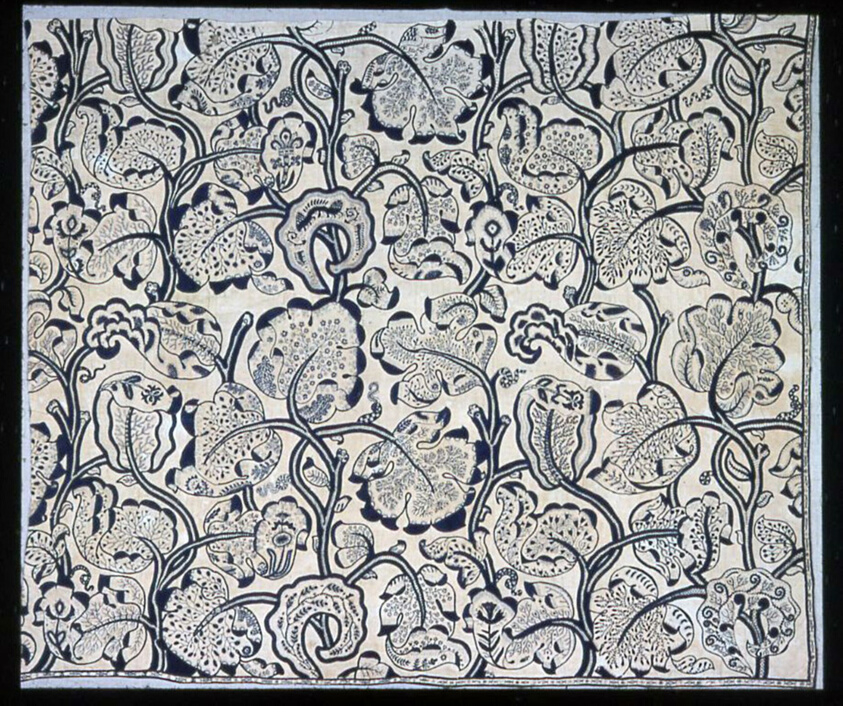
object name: Textile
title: Panel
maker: England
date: 17th century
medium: Cotton and linen, twill weave; embroidered with wool yarns in satin, chain, Bohkara couching (or laid Oriental couching), buttonhole, speckling, outline, stem, stroke, coral, rococo, fishbone, slanted stem, chain, link powdering, running, and plain stitches; pattern couching; fillings made with detached buttonhole, basket, Roumanian, double knot and rope stitches; French knots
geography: England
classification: textile; needlework (visual works)